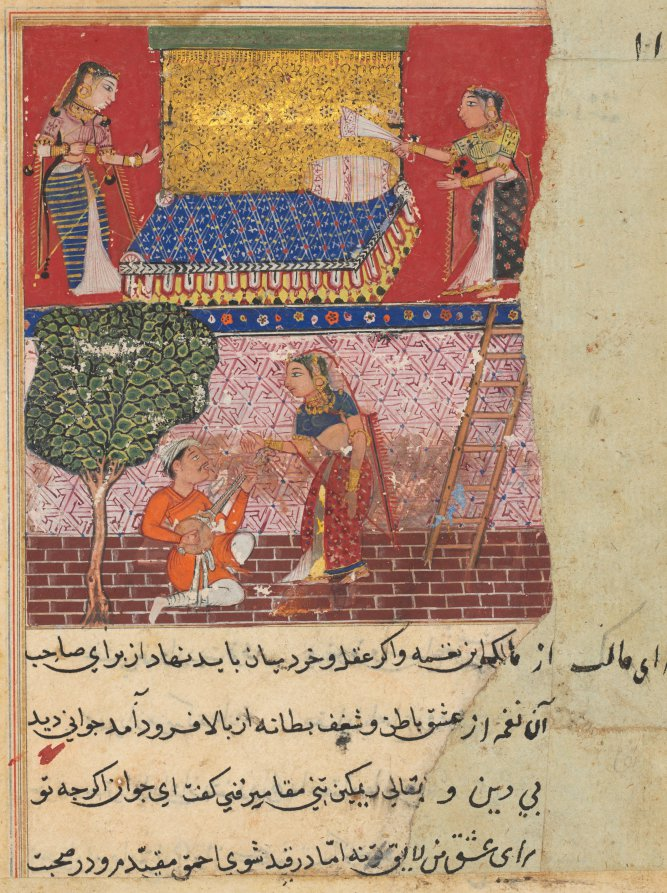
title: The daughter-in-law of the king of Banaras, charmed by the music of a vagabond, comes down to meet him, from a Tuti-nama (Tales of a Parrot): Sixteenth Night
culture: Mughal India, court of Akbar (reigned 1556–1605)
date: c. 1560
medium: gum tempera, ink, and gold on paper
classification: Painting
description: A ladder connects the daughter-in-law’s chambers to the courtyard below, where the vagabond kneels beneath a tree, a stringed instrument called a rebab in hand, mouth open in song. Because her husband is unpleasant and ill-tempered, the woman falls in love with the musician. The damage to the right side of this page was probably repaired in the early 1800s.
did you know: The whereabouts of the previous folio, probably depicting the parrot addressing Khujasta on the sixteenth night, are unknown.